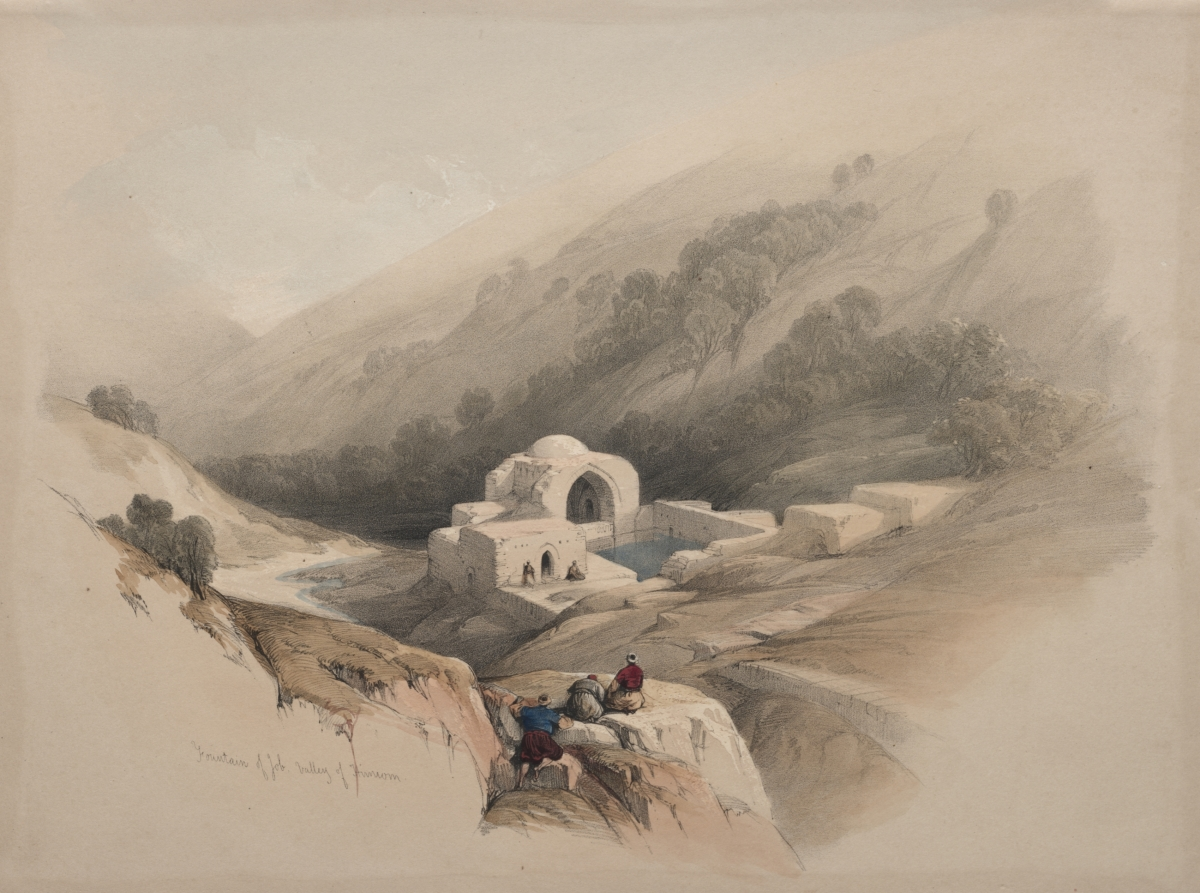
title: Fountain of Job, Valley of Hinnom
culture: England, 19th century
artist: David Roberts (Scottish, 1796–1864)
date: 1839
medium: color lithograph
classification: Print